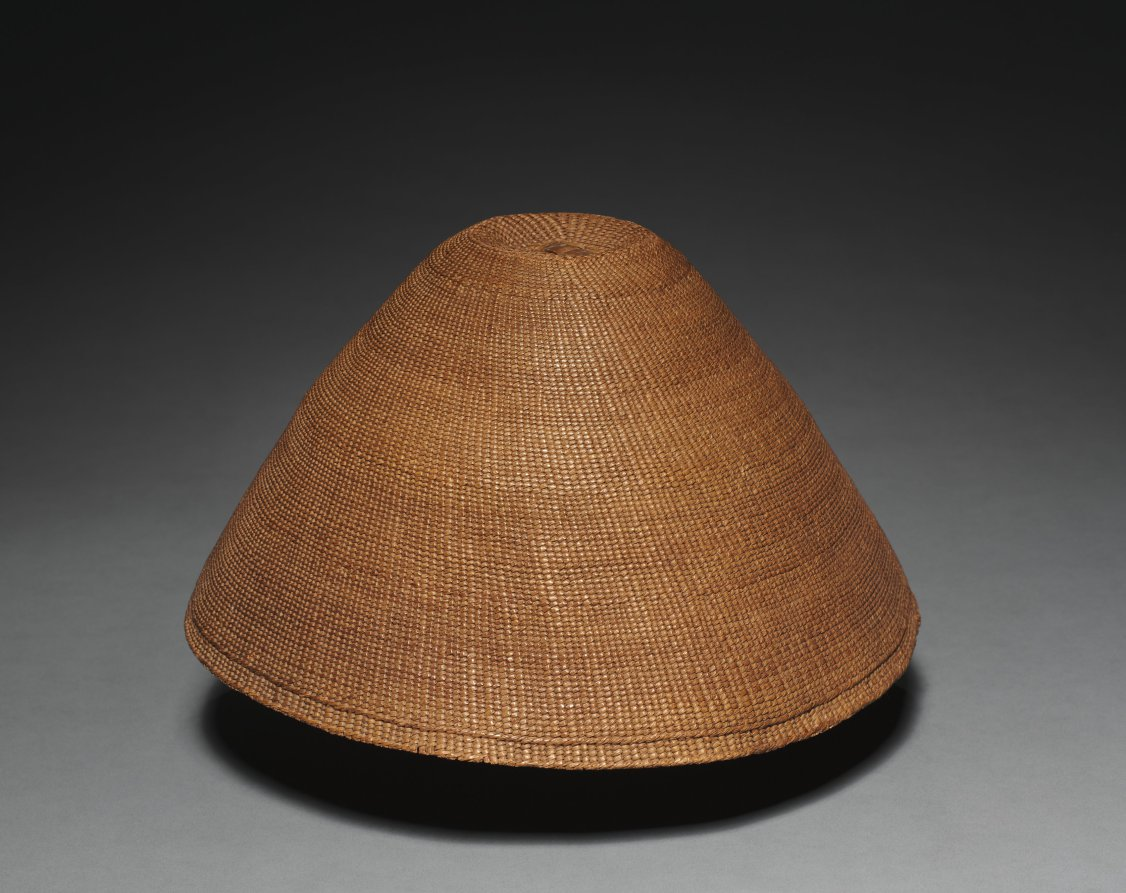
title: Hat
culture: Northwest Coast, Nuu-chah-nulth or Makah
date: before 1929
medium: cedar bark; twined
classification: Basketry